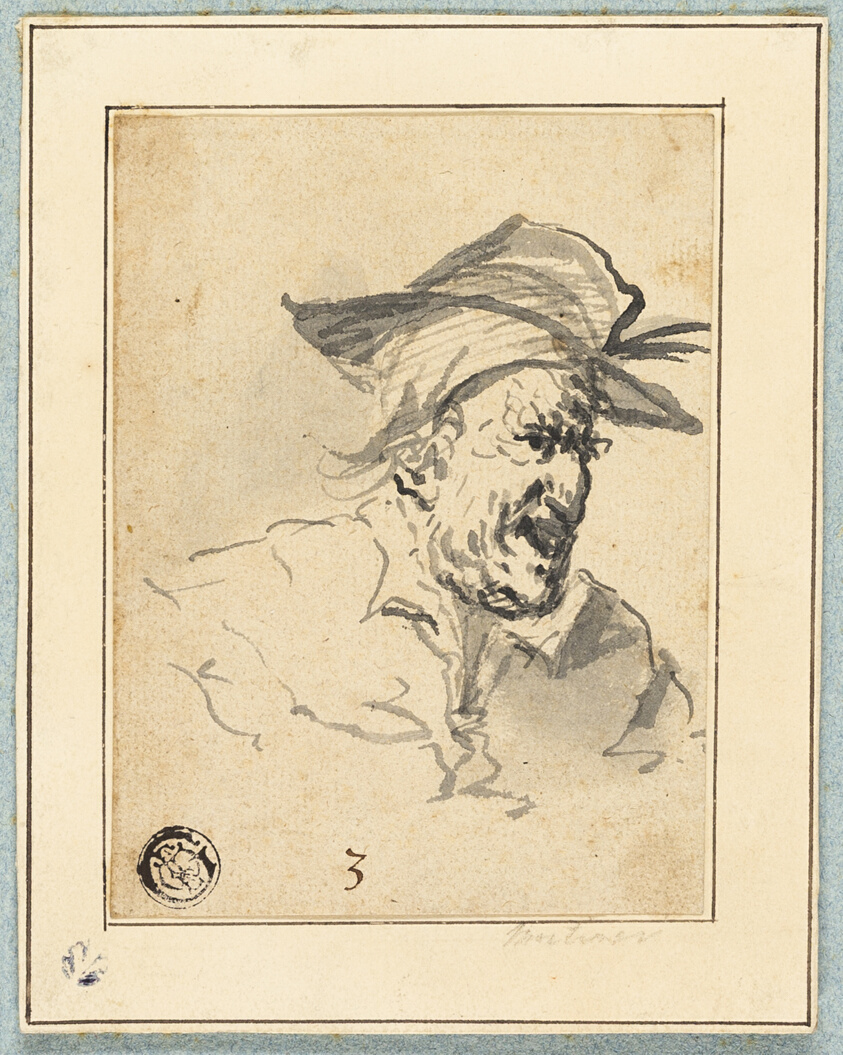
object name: Drawing and Watercolor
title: Character Sketch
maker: Possibly John Hamilton Mortimer (English, 1740-1779); or Francis Le Piper (English, 1640-1698)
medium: Pen and gray ink, with brush and wash, on cream laid paper, laid down on card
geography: England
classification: pen and ink drawings; drawings (visual works); prints and drawing